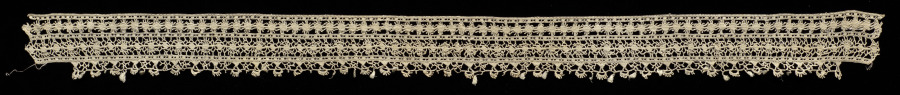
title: Lace Collar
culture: Italy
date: 1600s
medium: Knotted lace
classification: Lace